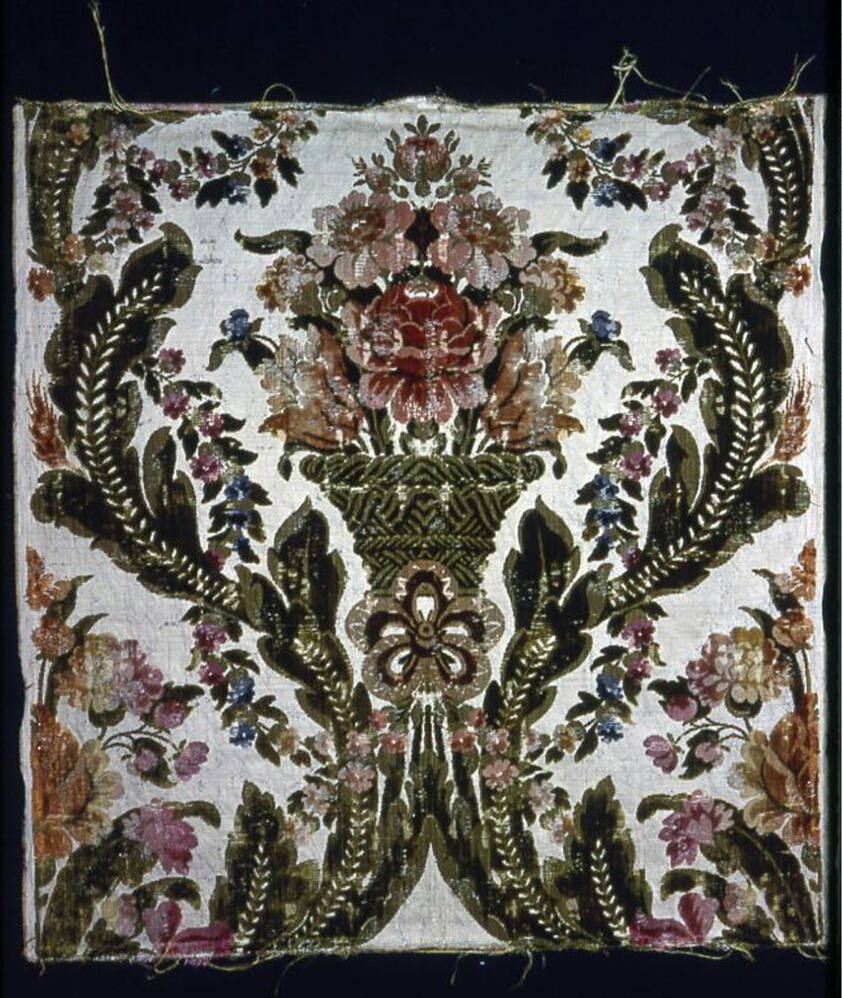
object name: Textile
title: Panel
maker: France or Italy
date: 1850/1900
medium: Silk and cotton, warp-float faced 3:1 'Z' twill weave with gilt-metal strip supplementary facing wefts and two-color supplementary pile warps forming cut and uncut voided velvet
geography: Italy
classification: textile; weaving - velvet